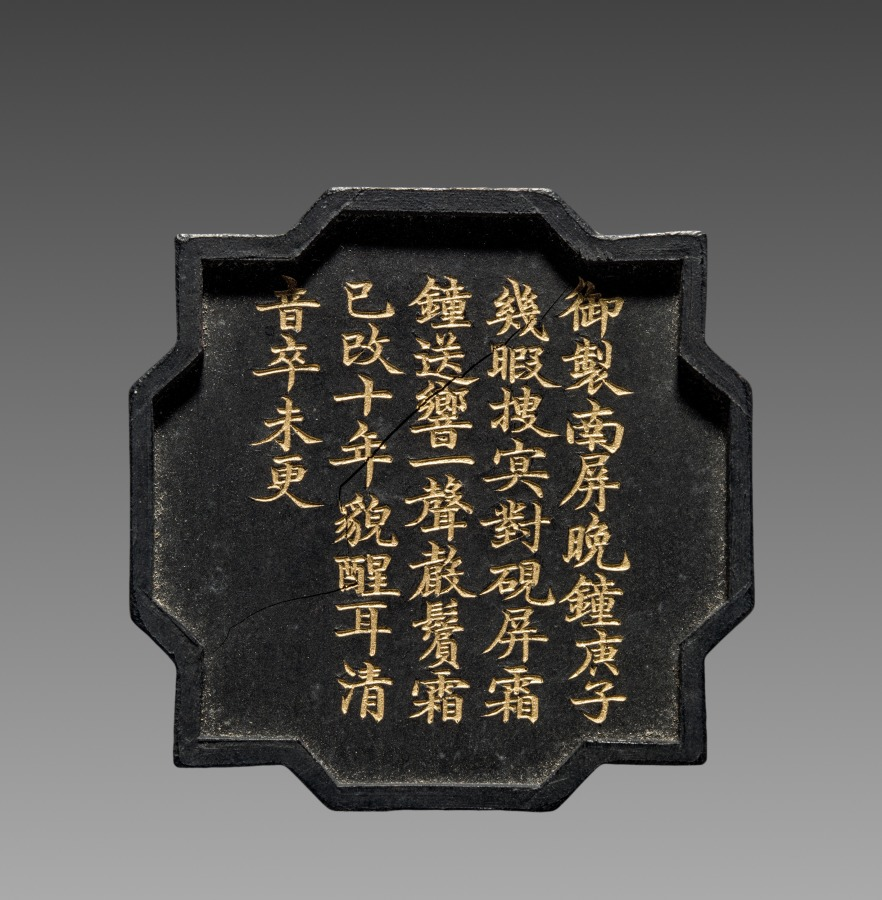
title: Ink Stick from an Imperially Commissioned Set of Ink Stick with Images and Poems of Famous West Lake Sites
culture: China, Qing dynasty (1644–1911), Qianlong reign (1736–95)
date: 1780–94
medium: Molded ink in black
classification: Miscellaneous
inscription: 御製南屏晚鍾庚子。 幾暇搜冥對硯屏， 霜鐘送響一聲聲， 鬢霜已改十年貌， 醒耳清音卒未更。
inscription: 乾隆年製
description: This is one of ten ink cakes of different shapes and colors stored in an exquisite lacquer box. Each is inscribed in gold with a poem by the Qianlong emperor, praising the ten famous sights of the Westlake in Hangzhou, near Shanghai. The Westlake is famous for its natural beauty; it was a favorite imperial destination and remains a tourist attraction today. Ink cakes (also called ink sticks) are dissolved with the addition of water and ground on the surface of a flat stone into liquid ink for painting and calligraphy. The precious ink cakes here, however, have never been used.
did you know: The design is Jingci Temple, a Buddhist temple beside West Lake in Hangzhou, China.